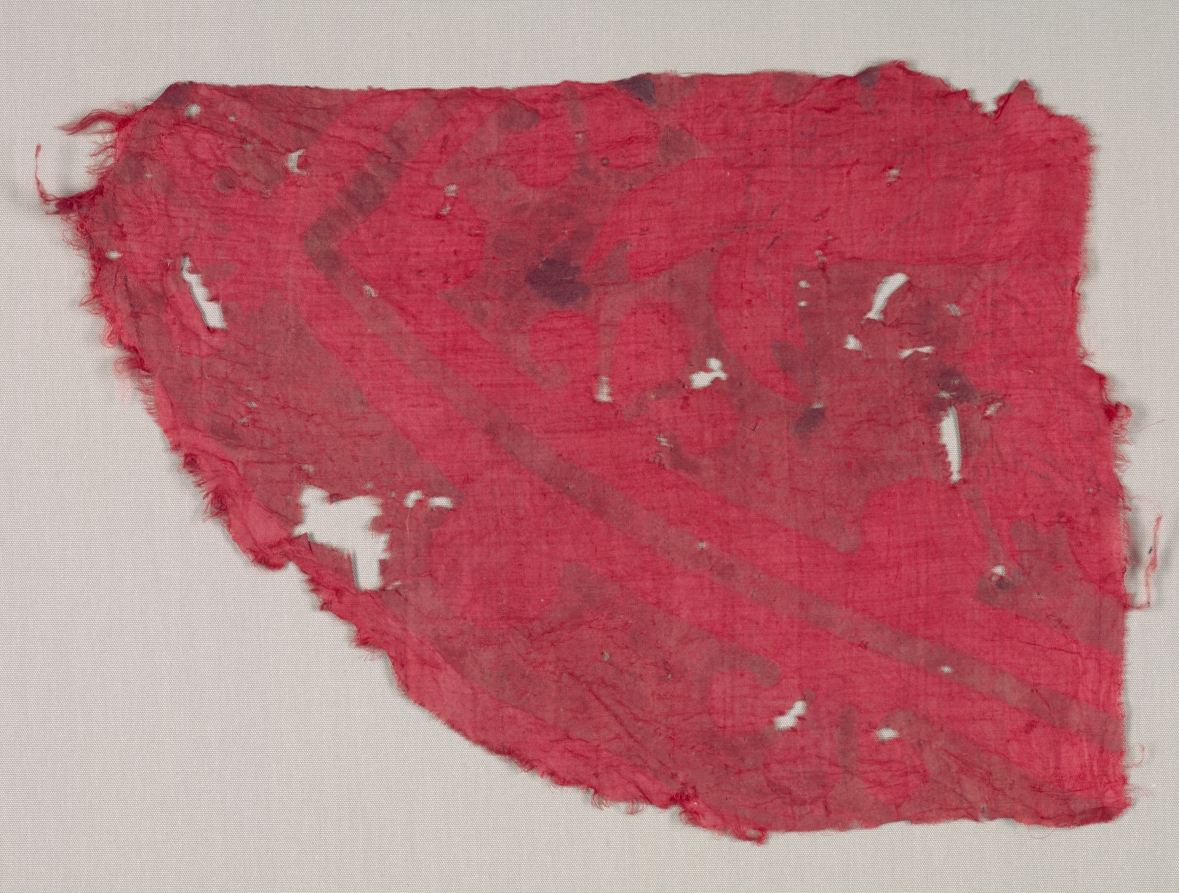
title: Printed Silk Fragment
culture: Unassigned, 5th century (?)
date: 400s(?) CE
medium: Silk: plain weave; gold leaf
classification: Textile